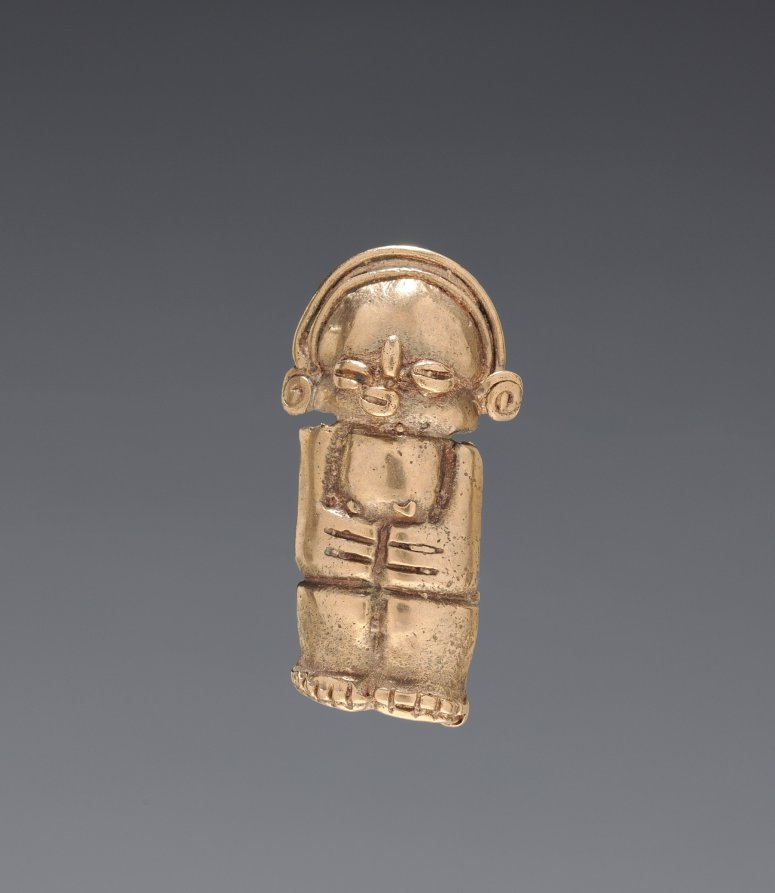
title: Necklace Figurine Bead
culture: Colombia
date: 1–700 CE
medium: cast gold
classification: Jewelry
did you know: Working with gold dates back to at least 500 BC in Ecuador and Colombia.